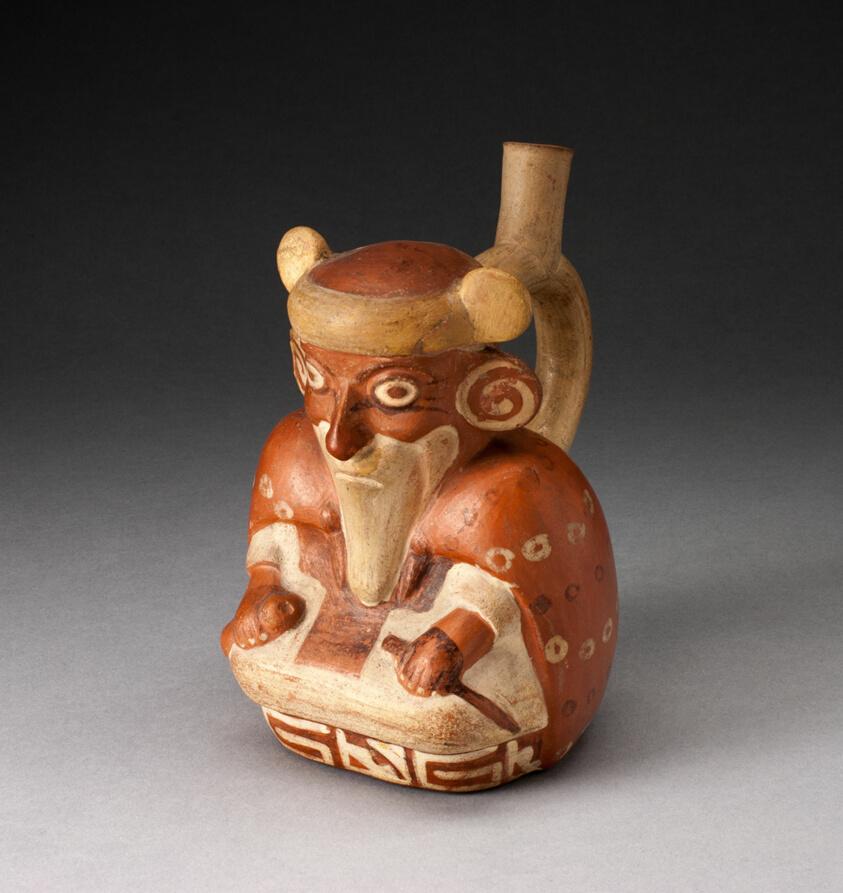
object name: Vessel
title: Single Spout Vessel in Form of Seated, Bearded Man Wearing a Cape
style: moche, mochica, early intermediate period, Pre-Columbian, americas, Arts of the Americas, andean, andes, south american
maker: Moche (North coast, Peru)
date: 100 BCE–500 CE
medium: Ceramic and pigment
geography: Peruvian North Coast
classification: earthenware; art of the americas; ceramics; vessel